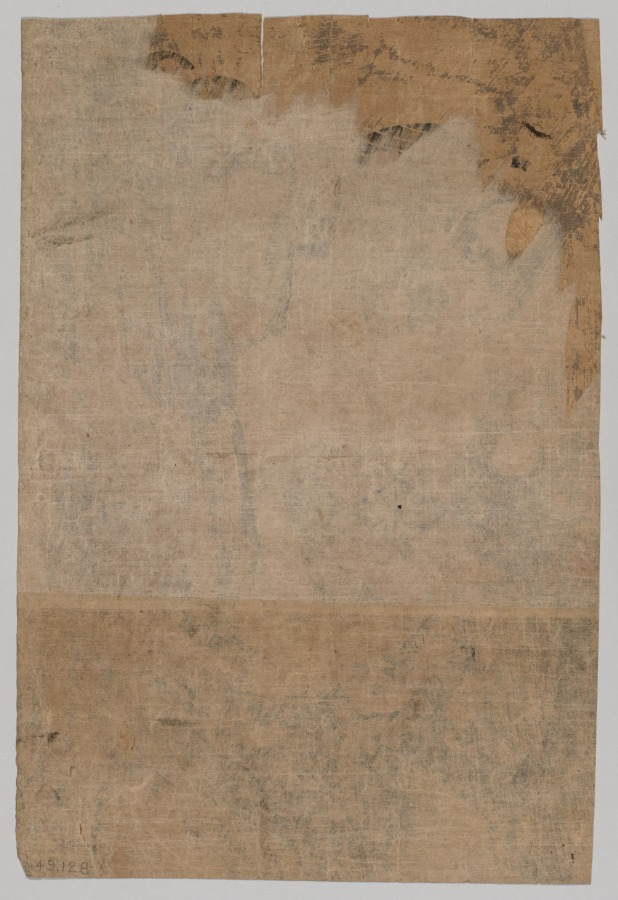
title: No Title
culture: Japan, Edo period (1615–1868)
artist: Kitagawa Utamaro (Japanese, c. 1754–1806)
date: 1753–1806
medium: color woodblock print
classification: Print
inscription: Signature: Utamaro fude